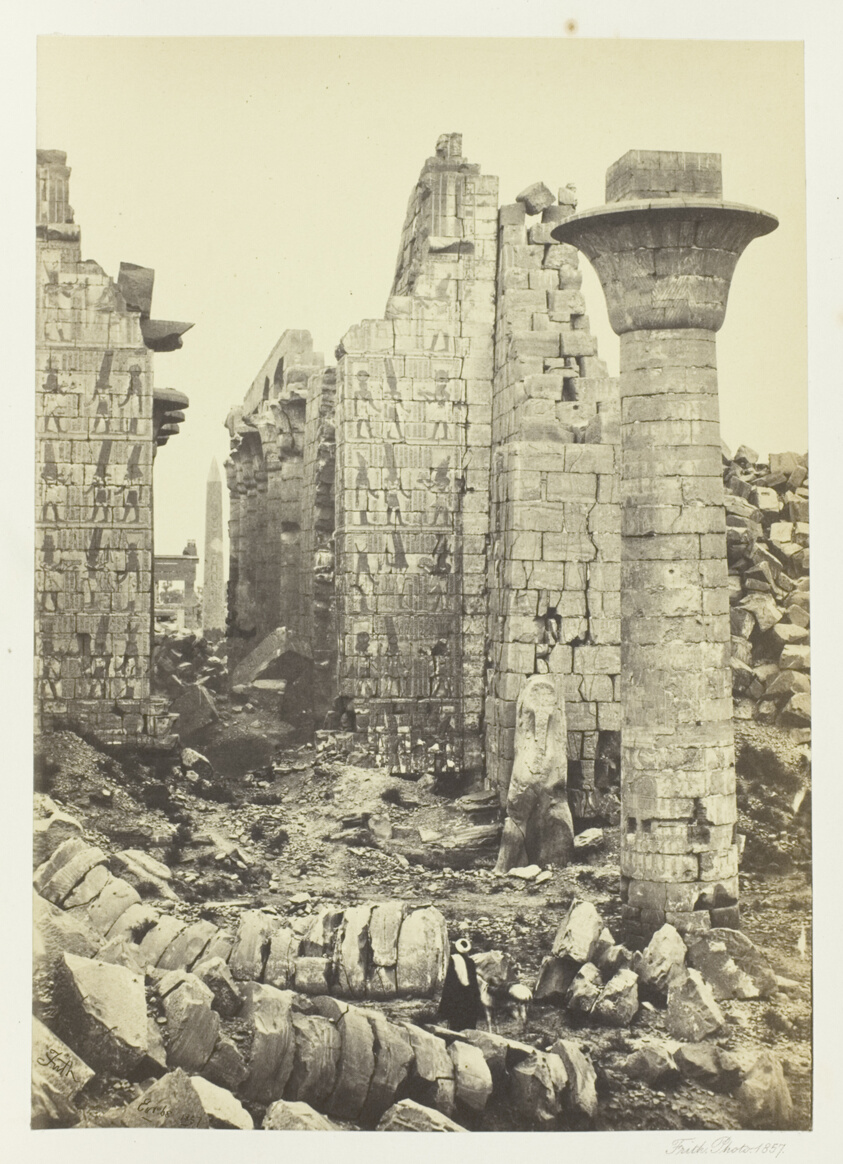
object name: Photograph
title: The Court of Shishak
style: 19th century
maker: Francis Frith (English, 1822–1898)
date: 1857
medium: Albumen print, pl. 9 from the album "Egypt and Palestine, Volume II" (1858/60)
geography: England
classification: albumen silver print; photographic process; photography; photograph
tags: Collected by Hugh Edwards, Egypt and Palestine